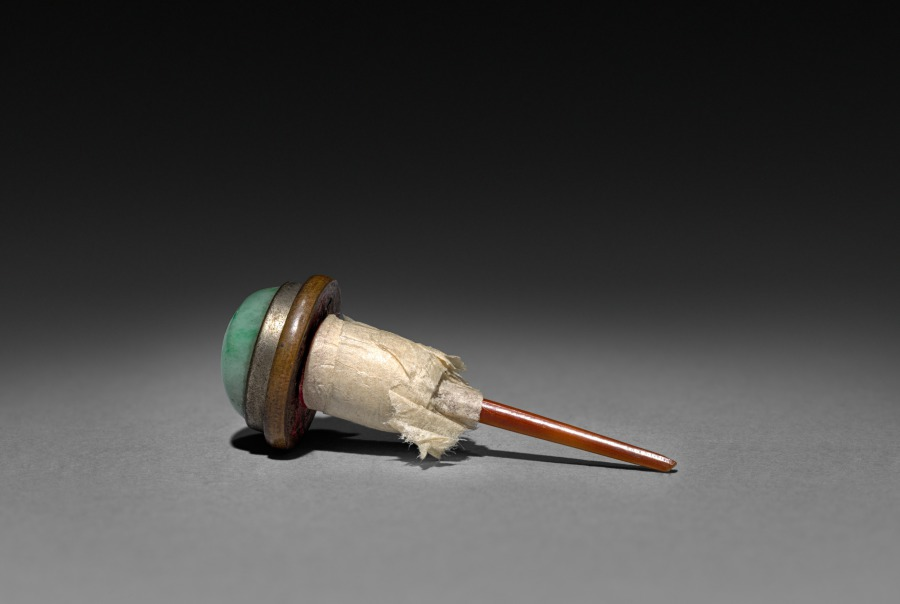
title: Snuff Bottle (stopper)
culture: China, Qing dynasty (1644-1911)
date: 1644–1911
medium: glass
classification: Glass